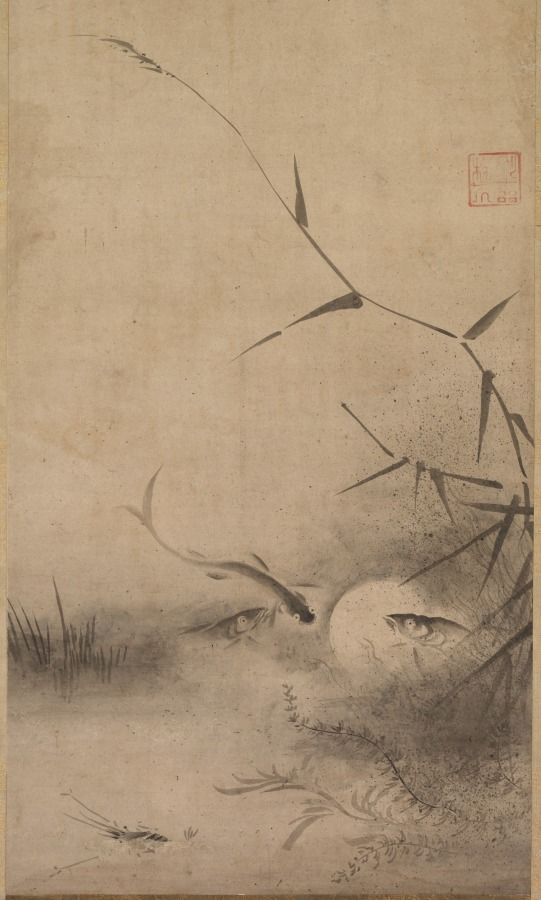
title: Fish and Seaweed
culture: Japan, Momoyama period (1573–1615)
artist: Rinkyo (Japanese)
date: 1573–1615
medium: one of a pair of hanging scrolls; ink on paper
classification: Painting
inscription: artist's seal at mid-right edge of painting.